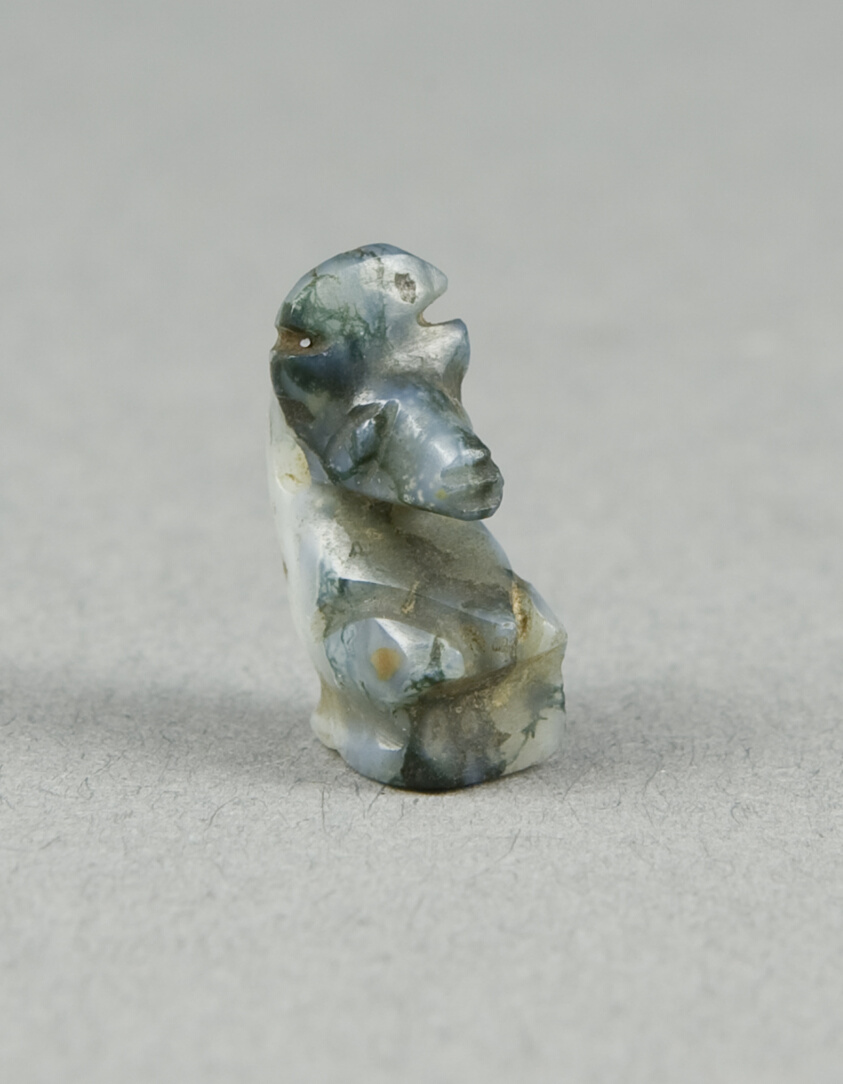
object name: Costume and Accessories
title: Amulet of the God Thoth, Seated with Lunar Disk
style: egyptian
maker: Egyptian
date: First Intermediate Period (?) (about 2160–2055 BCE)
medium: Stone (mottled)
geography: Egypt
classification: amulet; jewelry; stone; ancient art; costume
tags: gods (deities)